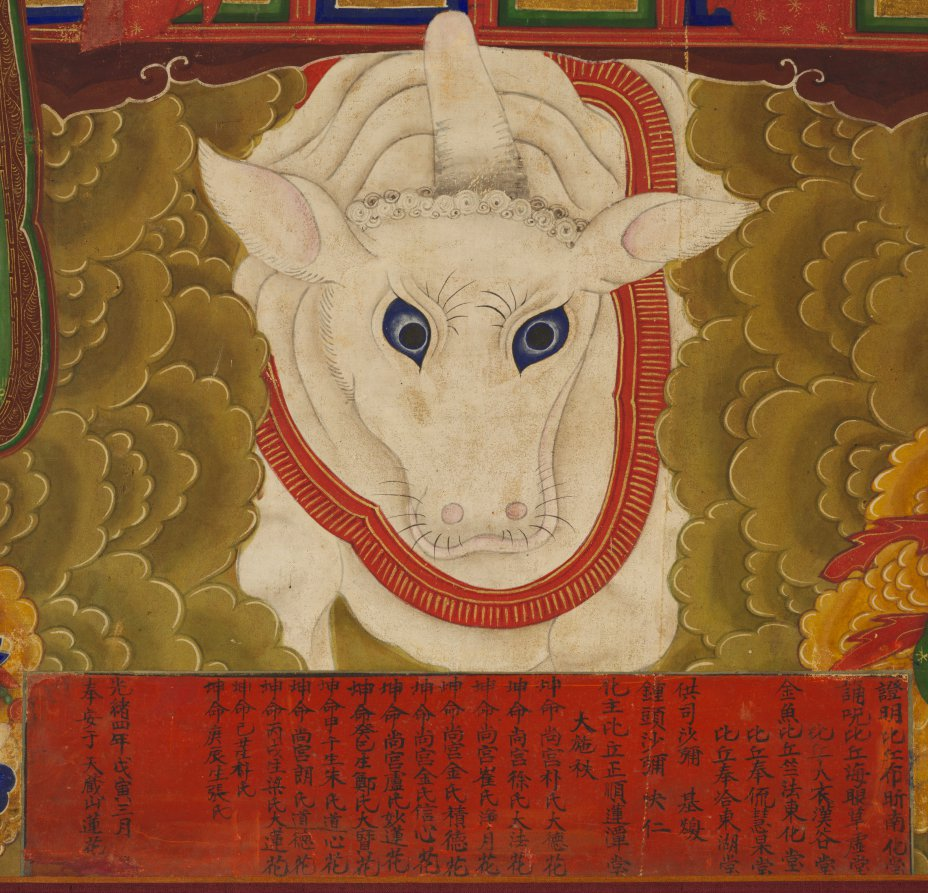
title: The Assembly of Tejaprabha Buddha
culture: Korea, Joseon dynasty (1392–1910)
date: 1878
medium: hanging scroll; ink, color, and gold on silk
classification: Painting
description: The main deity seated at the center is Tejaprabha, the Buddha of Radiant Light. Blazing beams of light emanating from its celestial body are this deity’s weapon to crush all kinds of calamities. Coincidently, when this painting was created, Korea was experiencing a height of foreign military aggressions, including invasions by the French (1866) and the US (1871). The inscription at the bottom center states that a group of ladies from the royal court commissioned the scroll to wish for the well-being of their families. During the late Joseon dynasty, Korean women became largely marginalized. Nevertheless, they remained important patrons of Buddhist art and architecture, voicing their concerns for their country and families in peril.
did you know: The central Buddha of Radiant Light is flanked by two attendant bodhisattvas, Sunlight and Moonlight, each in reverence posture.